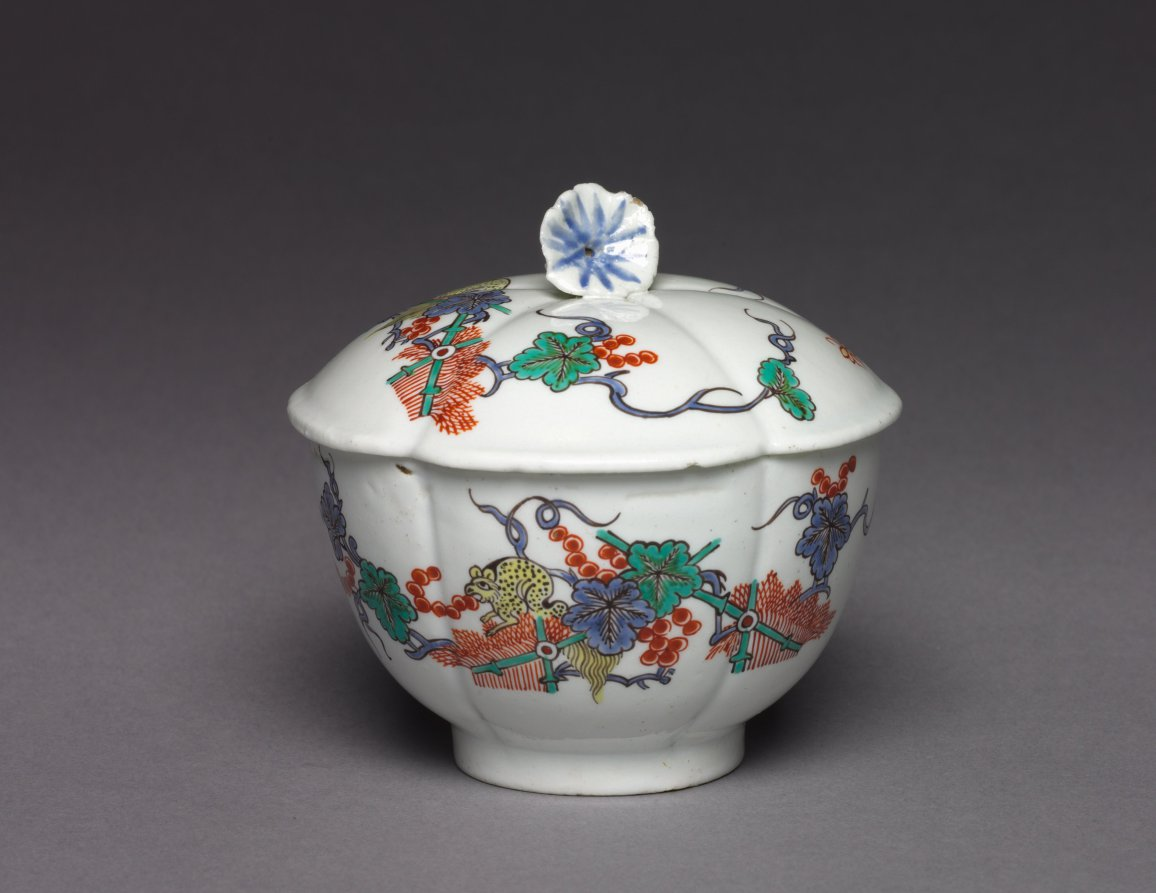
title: Sugar Bowl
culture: France, Chantilly, 18th century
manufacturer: Chantilly Porcelain Factory (French)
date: c. 1730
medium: soft-paste porcelain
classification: Ceramic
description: The pieces composing this individual tea set are entirely typical of Chantilly soft-paste porcelain in the Kakiemon style. Both the form and decoration of these pieces were inspired by Japanese prototypes. The use of knobs in the form of trumpet-shaped blossoms is characteristic of Chantilly wares.